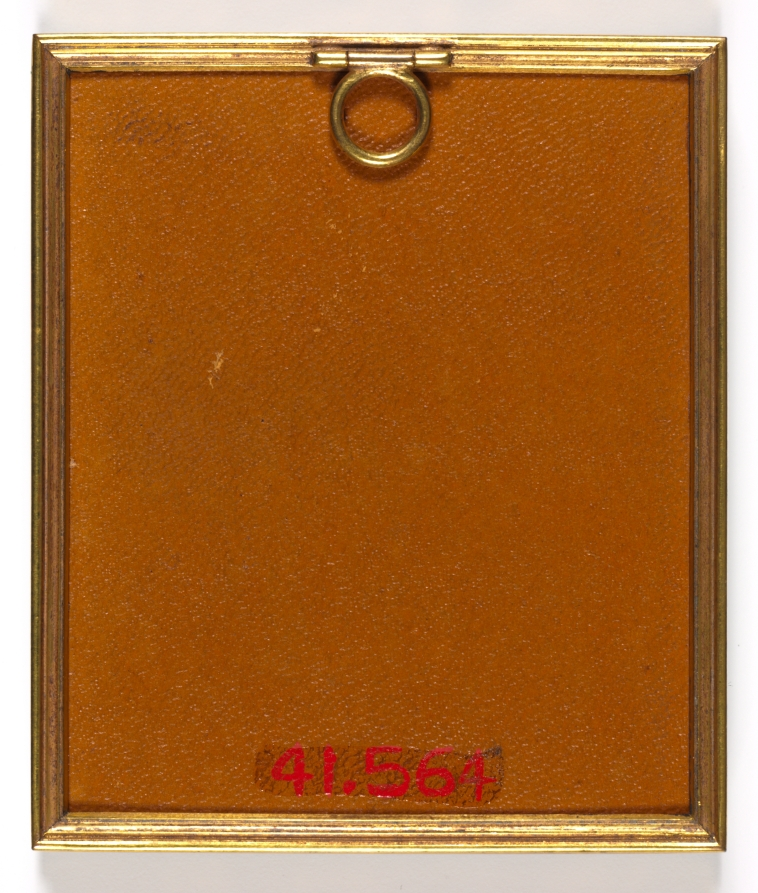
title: Portrait of Anna Maria Woolf, née Smart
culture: England, 18th century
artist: John I Smart (British, 1741–1811)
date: c. 1785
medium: graphite and wash on laid paper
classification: Portrait Miniature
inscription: Signature: none; inscribed on front of paper at upper right corner: 1[?][?]; inscribed on paper backing, in graphite at left center: Indi; upside down, at left above center: 38; inscribed in brown ink at center, on back of drawing: Mrs Peirce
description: Although it is impossible to say whether or not it was always part of the artist’s process to execute a preparatory sketch prior to painting each miniature, we do know that John Smart retained many hundreds of these sketches. A group of preparatory sketches—of which this portrait is one—descended through the Smirke family after Smart’s daughter Sarah gave a sketchbook containing preparatory portrait studies to her friend Mary Smirke, sister of the celebrated Victorian architect Sydney Smirke. This book was probably broken up around 1877 when it was divided between Sydney’s daughters Mary Jemmett and Mrs. Lange, whose portions were both sold at auction in 1928. This portrait was assigned the historically colorful but fictitious title of “Duchess Christina” at some point after memory of its true identity had been lost. Giving illustrious titles to portraits of unknown sitters was a popular strategy adopted by dealers during the nineteenth and twentieth centuries, often applied to miniature portraits and, in particular, to Smart’s sketches of women. Here, the sitter’s head is turned slightly to her left. She has dark brown eyes, rosy cheeks, and long, wavy dark hair falling below her shoulders. She wears a white dress with long sleeves and a ruffled bodice, and a small lozenge-shaped pendant around her neck. She is placed inside a faintly suggested oval, and the background is unpainted. The paper backing—removed in 1993—was inscribed with “38” and “Indi,” which may suggest that the sketch was executed during Smart’s time in India. The inscription that was discovered on the back of the drawing after the paper backing was removed reads, “Mrs [or perhaps Miss] Peirce.” Although the inscription appears to be in the artist’s hand, and in the brown ink he used to annotate his preparatory sketches, its relationship to this portrait is unclear. The sitter is probably Anna Maria, Smart’s eldest daughter by his first wife, whose name is unknown. Anna Maria (1766–1813) traveled with her father to India in 1785, sailing from England on April 19 and arriving in Madras on September 6. If the work was executed in India at the time Anna Maria accompanied her father there, the sketch may be dated to around 1785, the year they moved to the subcontinent. Anna Maria would have been around 18 years old. The fact that this portrait is of an older girl who dons a plain, modest dress and wears her hair down suggests an intimacy not found in the type of portraits Smart commonly executed of women wearing fine gowns and elaborately dressed hair.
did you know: After living in India for many years, Anna Maria was en route to England when she was forced to disembark at St. Helena to give birth to her son.